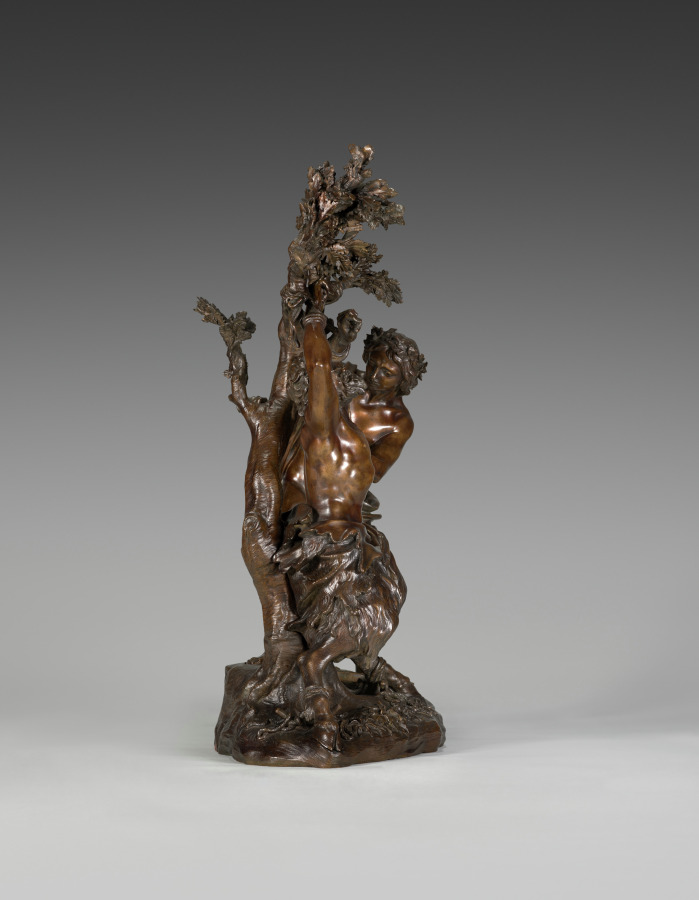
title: Apollo Flaying Marsyas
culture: Italy, Florence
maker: Giovanni Battista Foggini (Italian, 1652–1725)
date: c. 1691–1700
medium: Bronze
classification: Sculpture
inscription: 1136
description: According to myth, the overconfident satyr (half-goat, half-man) Marsyas challenged Apollo, god of the arts, to a musical duel. The defeated Marsyas was tied to a tree and skinned alive in punishment for his pride. Foggini’s bronze captures the moment after Apollo’s victory as the bound Marsyas cries out in agony while the god makes the first incision. The satyr’s anguish is echoed by the gnarled branches; Apollo’s wrath is manifested in his billowing drapery.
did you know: The lyre with which Apollo outperformed Marsyas can be seen between his feet, cast down upon his victory.